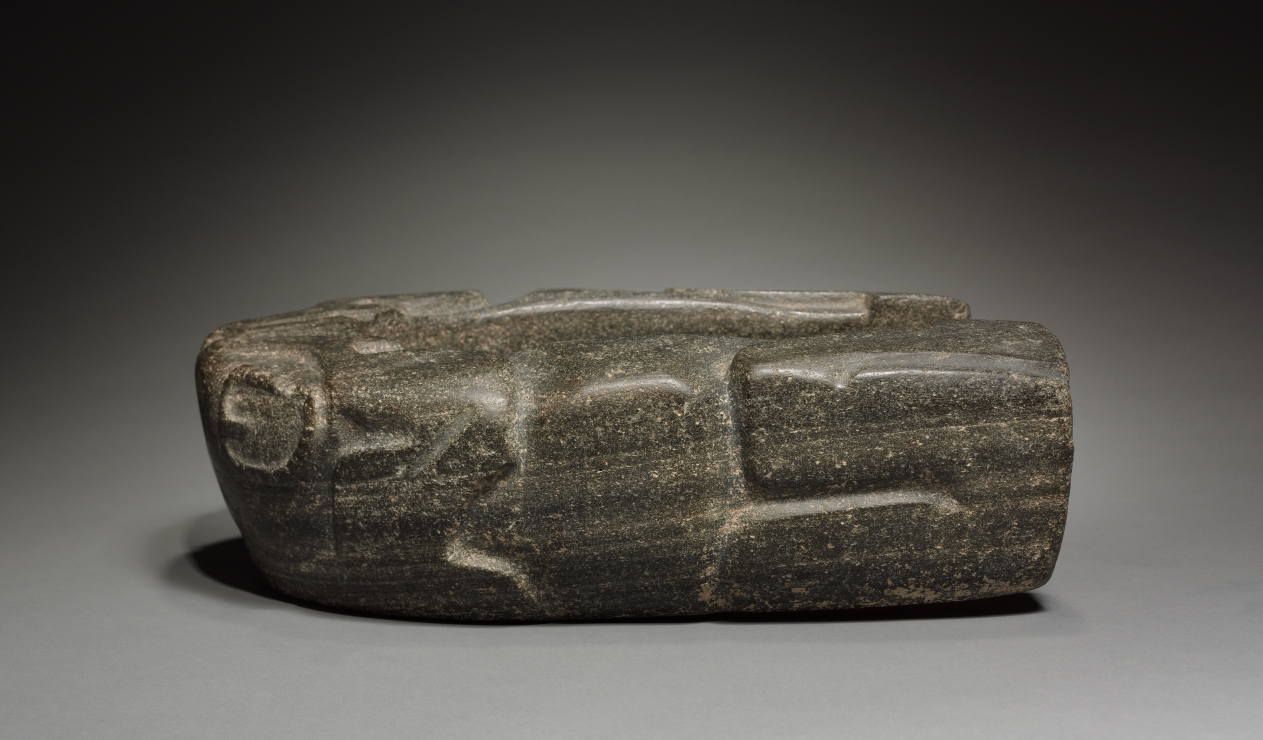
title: Unfinished Yoke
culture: Mexico, Central Veracruz, Classsic Veracruz style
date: 600–900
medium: gray stone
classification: Sculpture